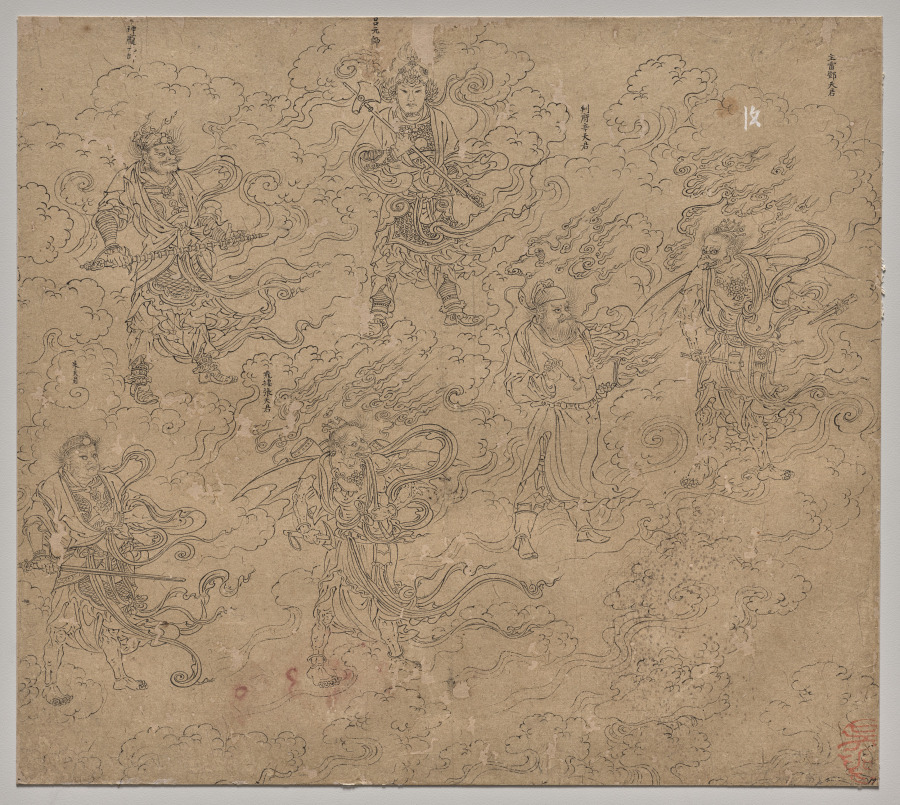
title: Album of Daoist and Buddhist Themes: Procession of Daoist Deities: Leaf 19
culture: China, Southern Song dynasty (1127-1279)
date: 1200s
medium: album, ink on paper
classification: Painting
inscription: 主雷鄧天君; 判府辛天君; 呂元帥; 飛捷張天君; 朱天君; □神龐元帥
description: This leaf is part of an important album of 50 drawings encompassing three subjects: processions of Daoist deities to the celestial spheres, the Ten Kings of Hell, and Erlang’s Campaign to Rid Mount Guankou of Dangerous Beasts (soushan tu 搜山圖). This section of the Daoist pantheon features, in the lower row from left to right, the Heavenly Lords Zhu Yanshi 朱彥矢, Zhang An 張安, Xin Jiang 辛江, and Deng Cheng 鄧成. Depicted in the upper row from left to right are the Field Marshals Peng Qiao 龐喬 and Lu 呂元帥 . Their names are inscribed above each figure.